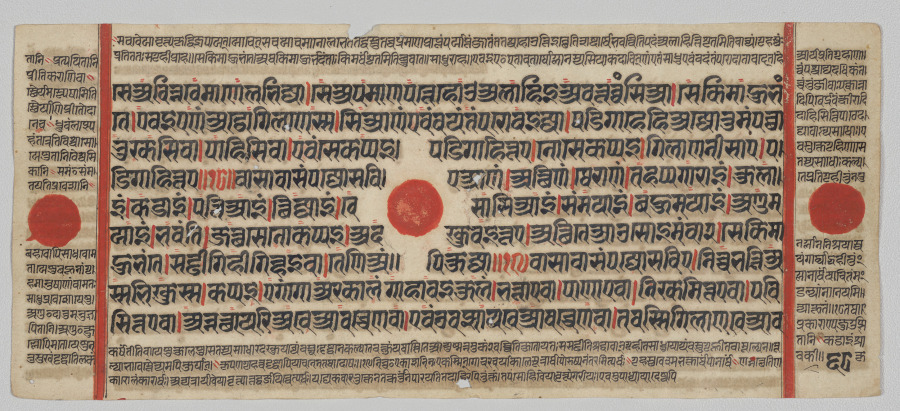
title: Text, Folio 68 (verso), from a Kalpa-sutra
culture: Western India, Gujarat, last quarter of the 15th century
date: c. 1475–1500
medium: Gum tempera, ink, and gold on paper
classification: Painting